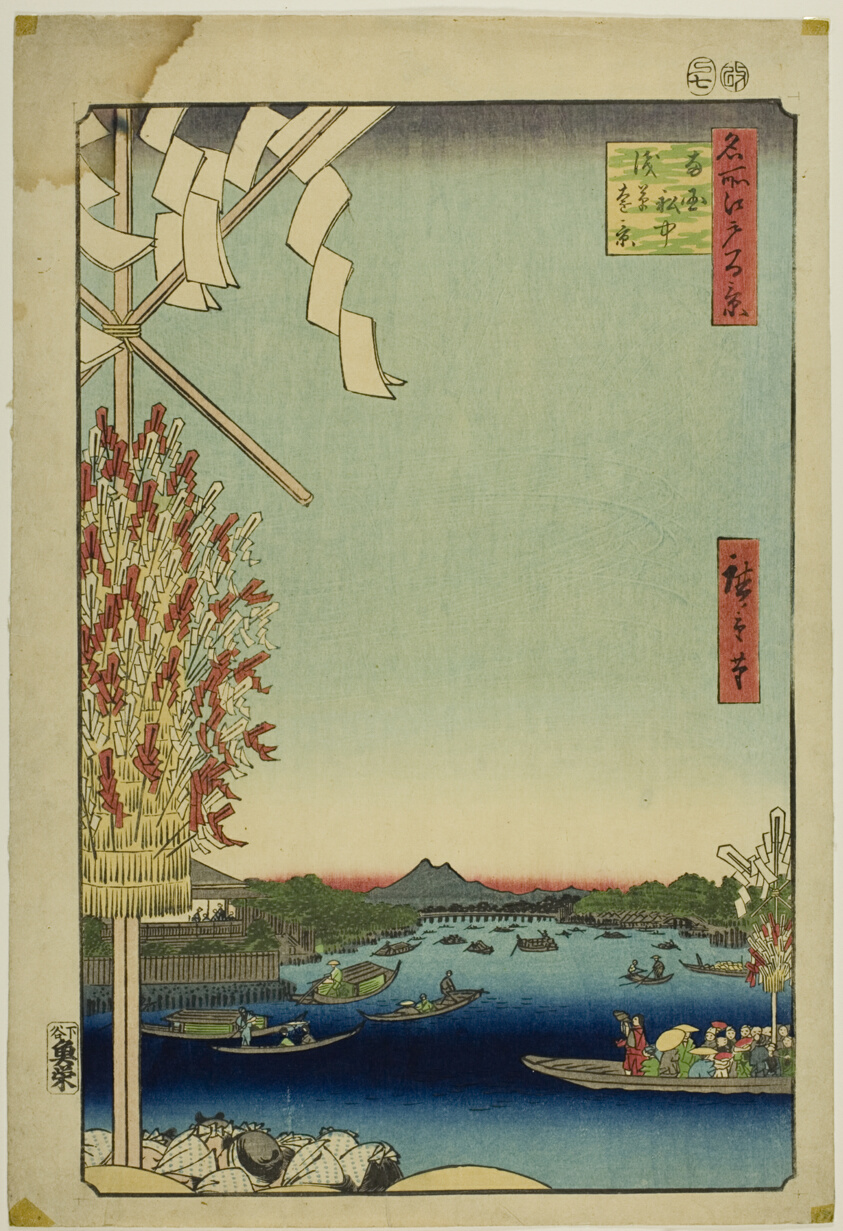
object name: Print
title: Asakusa River, Great Riverbank, Miyato River (Asakusagawa Okawabata Miyatogawa), from the series "One Hundred Famous Views of Edo (Meisho Edo hyakkei)"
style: Japanese (culture or style)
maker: Utagawa Hiroshige 歌川 広重; Japanese, 1797–1858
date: 1857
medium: Color woodblock print; oban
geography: Japan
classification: woodblock print; print